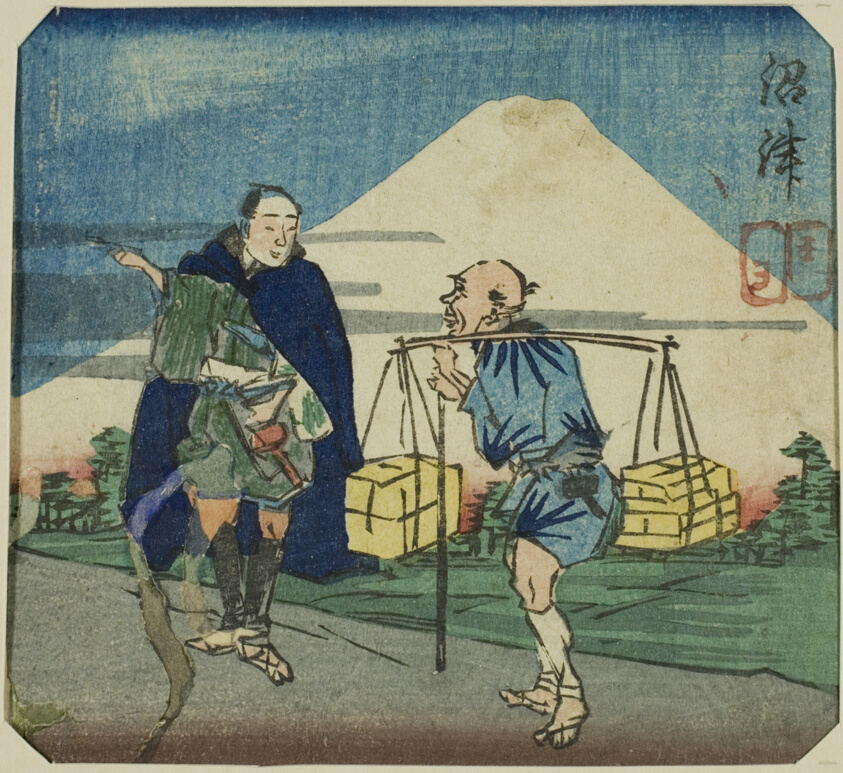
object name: Print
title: Numazu, section of a sheet from the series "A Harimaze Mirror of Joruri Plays (Harimaze joruri kagami)"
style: Japanese (culture or style)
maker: Utagawa Kuniyoshi (Japanese, 1787-1861)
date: 1854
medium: Color woodblock print; section of harimaze sheet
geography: Japan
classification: woodblock print; print; asian art